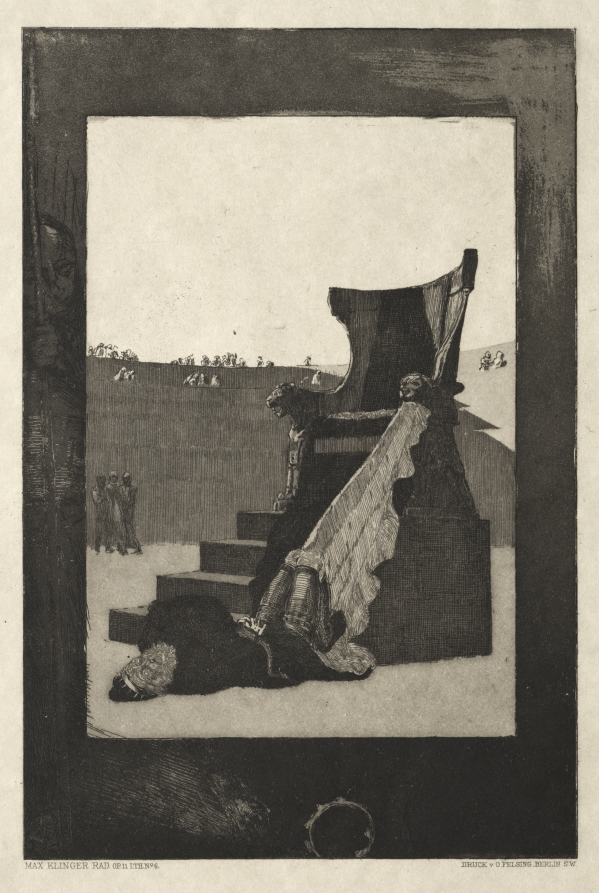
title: Vom Tode I, (Opus II, 1889) No. 6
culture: Germany, late 19th century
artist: Max Klinger (German, 1857–1920)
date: 1889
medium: etching and aquatint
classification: Print